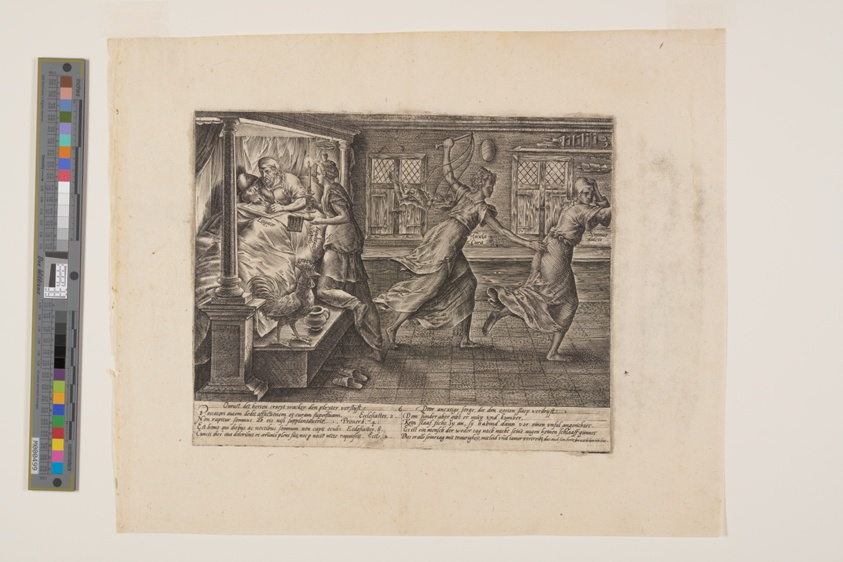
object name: Print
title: The Sleepless Night of the Litigant, from Litis Abusus (The Abuses of the Law)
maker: Hendrick Goltzius (Dutch, 1558–1617)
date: c. 1576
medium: Engraving on ivory laid paper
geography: Netherlands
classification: print; paper; prints and drawing; engraving